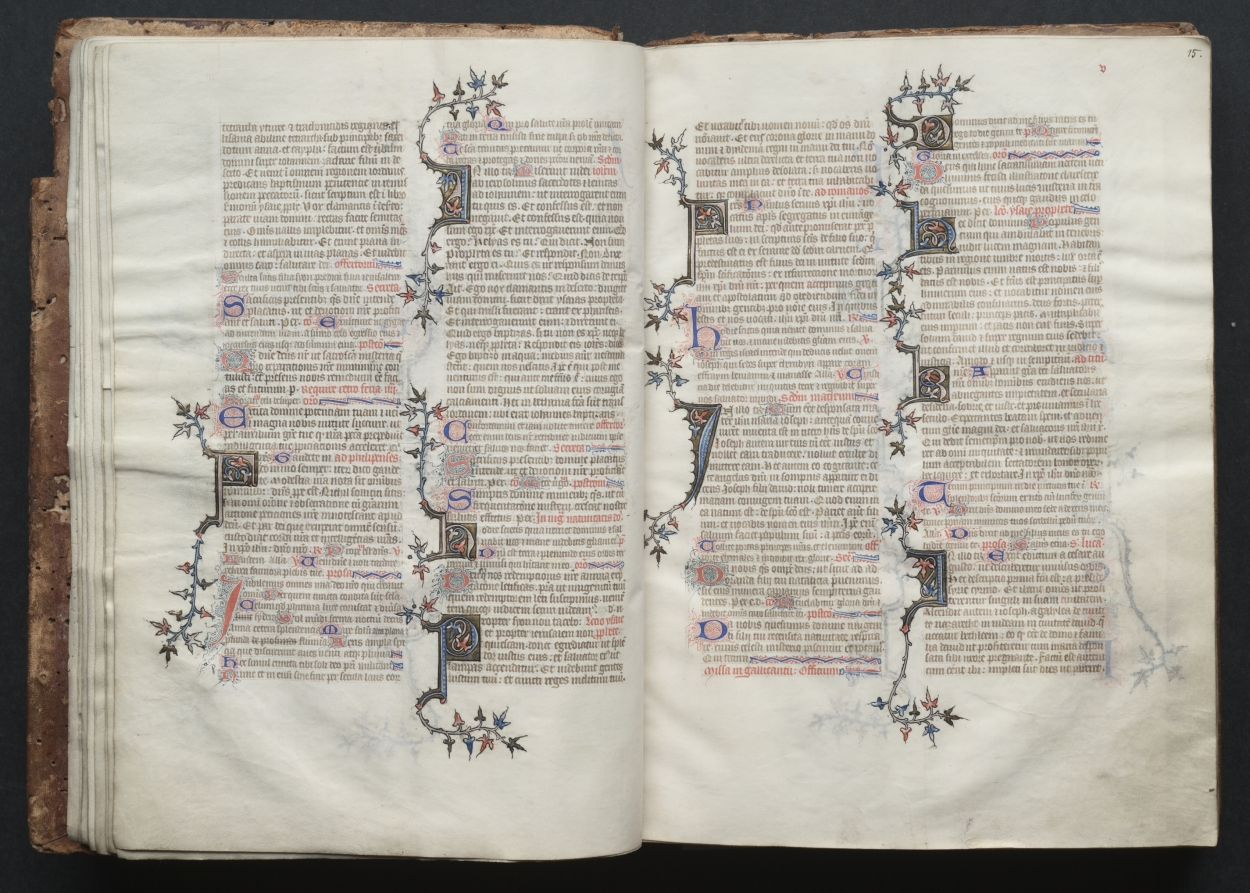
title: The Gotha Missal: Fol. 15r, Text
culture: France, Paris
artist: Master of the Boqueteaux (French)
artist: and Workshop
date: c. 1375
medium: ink, tempera, and gold on vellum; blind-tooled leather binding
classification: Bound Volume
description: The style and quality of this manuscript's decoration is typical of deluxe Parisian books made for aristocratic or royal patrons. Most of the book's decoration appears to be the work of the Master of the Boqueteaux, an artist active at the court of King Charles V (died 1380). His style was apparently shared by a number of book illuminators working in and around Paris. It is very possible that the Gotha Missal belonged to Charles V, but is not provable because the manuscript has no royal portraits and lacks a colophon. Given the book's magnificent decoration, however, it would seem that it was produced for a Valois prince, if not for the king himself. The manuscript receives its name from the German dukes of Gotha, its later owners.